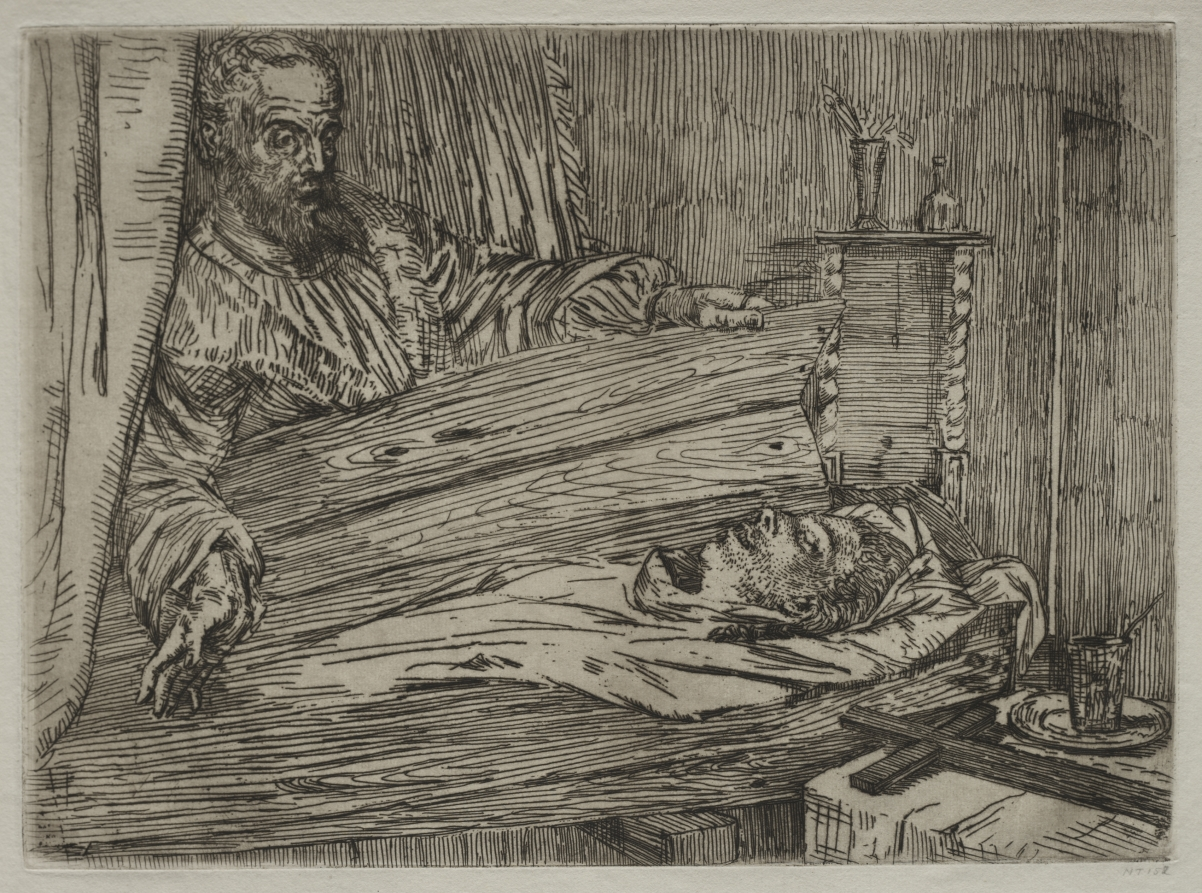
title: Bérénice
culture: France, 19th century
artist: Alphonse Legros (French, 1837–1911)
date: 1861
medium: etching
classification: Print